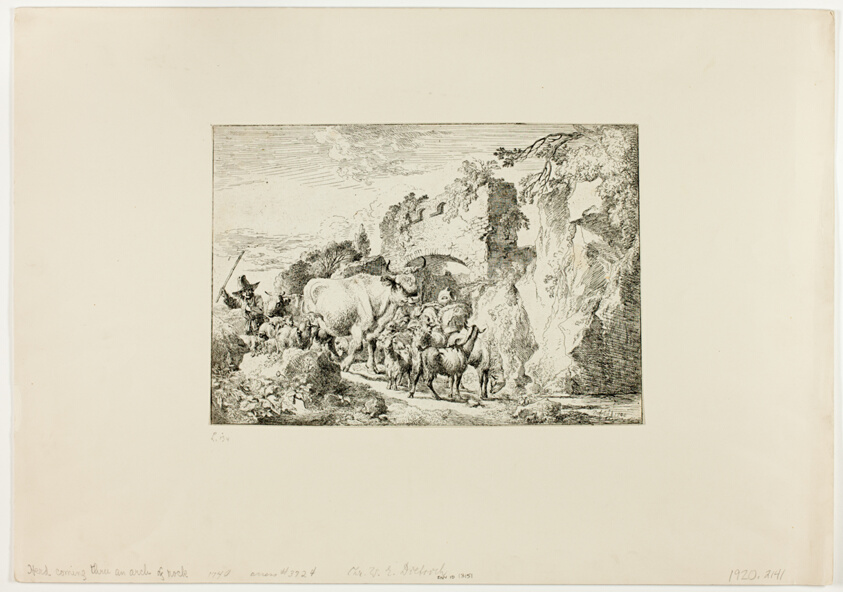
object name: Print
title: Herd Coming through an Arch of Rock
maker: Christian Wilhelm Ernst Dietrich (German, 1712-1774)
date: 1740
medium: Etching in black on laid paper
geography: Germany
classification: print; prints and drawing